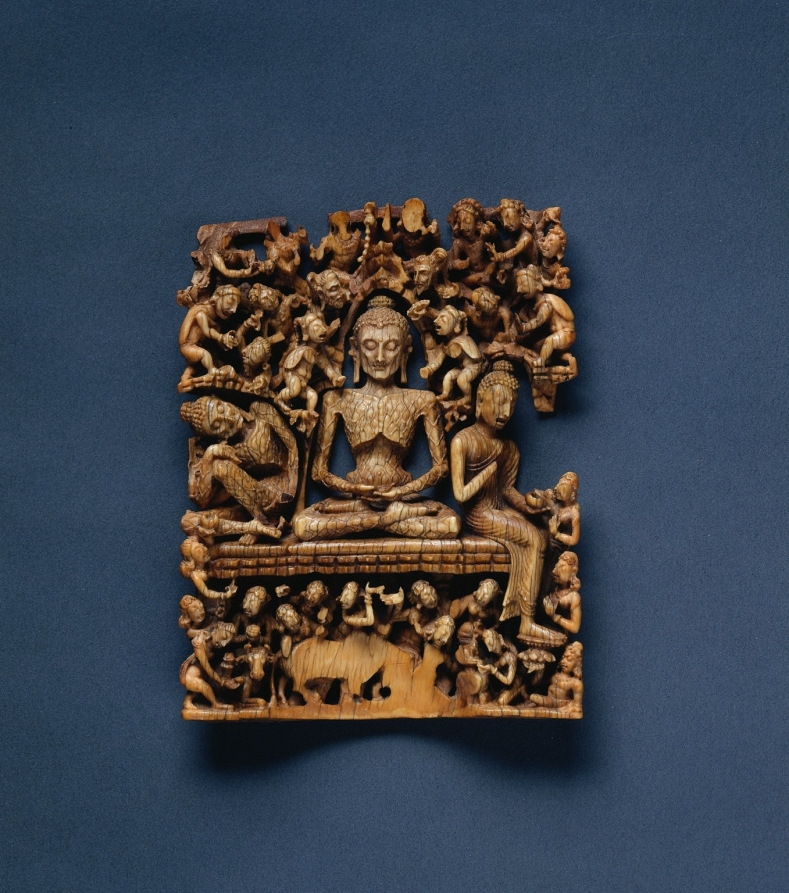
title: Fasting Buddha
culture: India, Kashmir, 8th century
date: 700s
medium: ivory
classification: Ivory